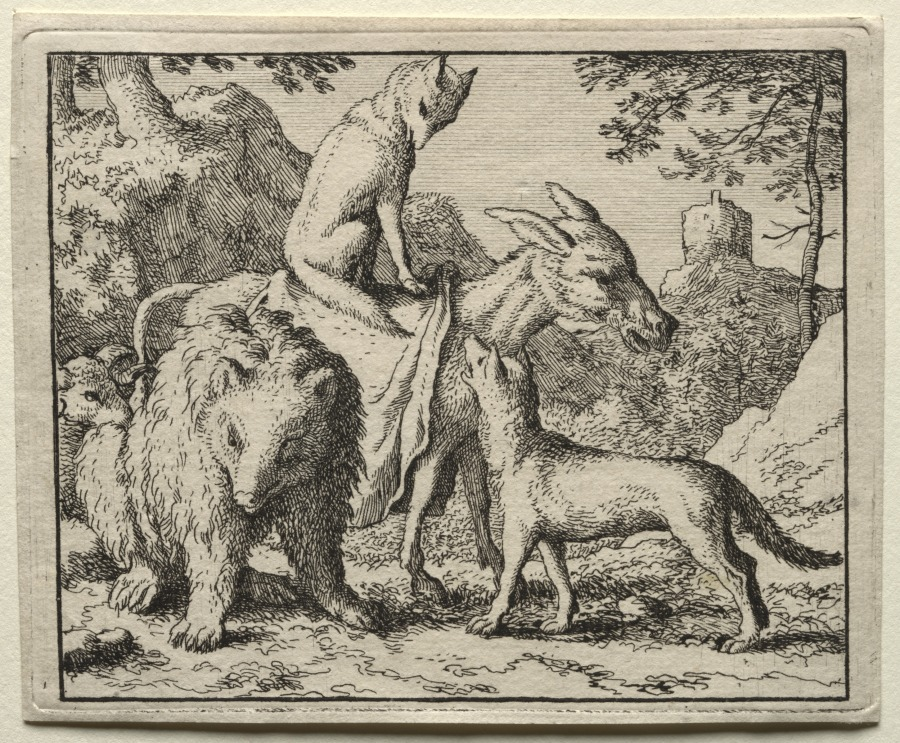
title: Reynard the Fox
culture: Netherlands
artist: Allart van Everdingen (Dutch, 1621–1675)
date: 1650–75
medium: etching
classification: Print